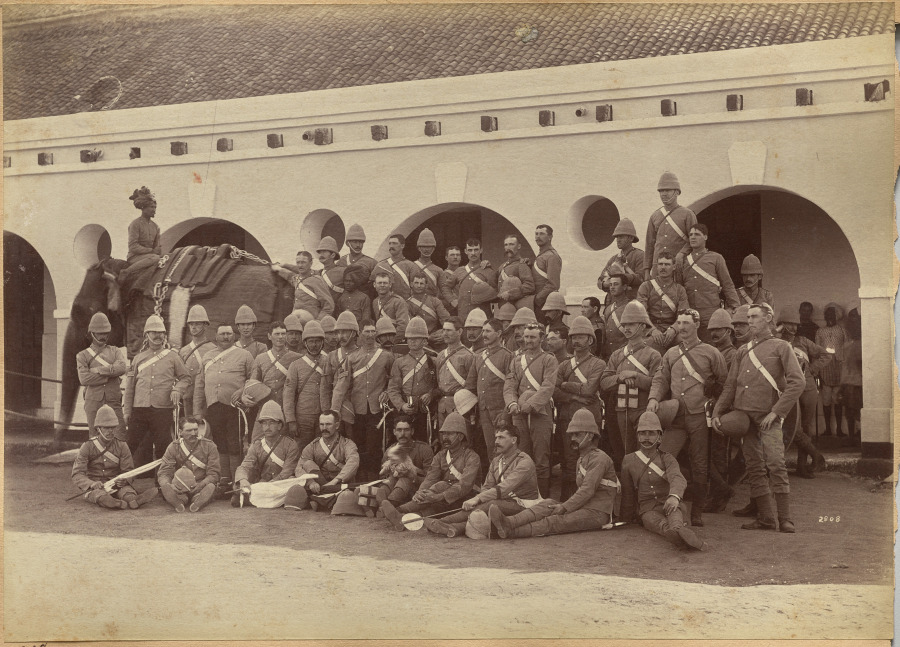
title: Men of Elephant Battery, Jhansi (verso)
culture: India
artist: Raja Deen Dayal (Indian, 1844–1905)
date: c. 1882–87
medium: albumen print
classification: Photograph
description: These photographs are part of an album, now disassembled, of around 105 photographs taken in India between 1885 and summer 1887 that provide glimpses into the lives of the British colonial elite and royal and upper-class Indians. The museum holds another group of 37 pictures from this album (2016.266), which was probably commissioned by a British civil servant visiting or working in India around 1888 as a personal souvenir of his experiences there.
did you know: Raja Deen Dayal is regarded now, and was considered during his lifetime, to be India’s most important 19th-century photographer.